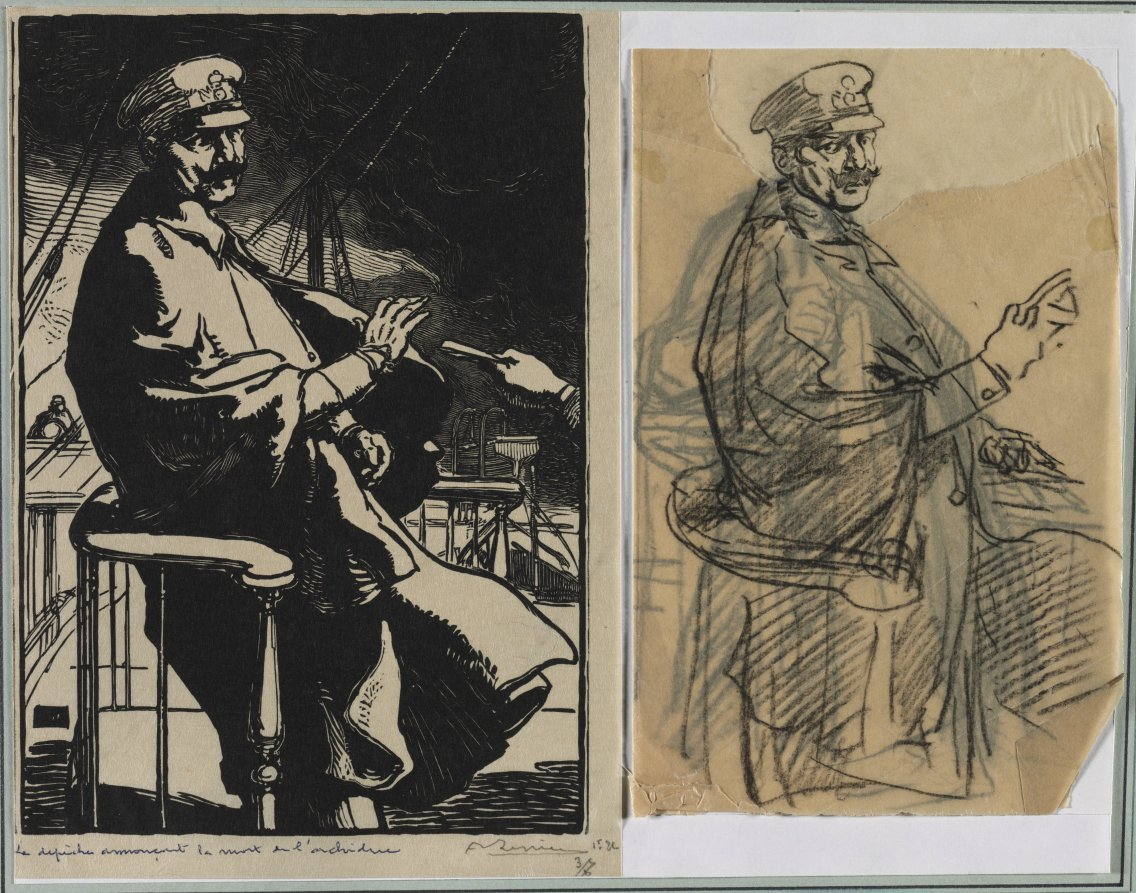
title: La Dépèche annoncant la mort de l'archiduc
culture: France, 20th century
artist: Auguste Louis Lepère (French, 1849–1918)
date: 1914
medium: black chalk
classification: Drawing